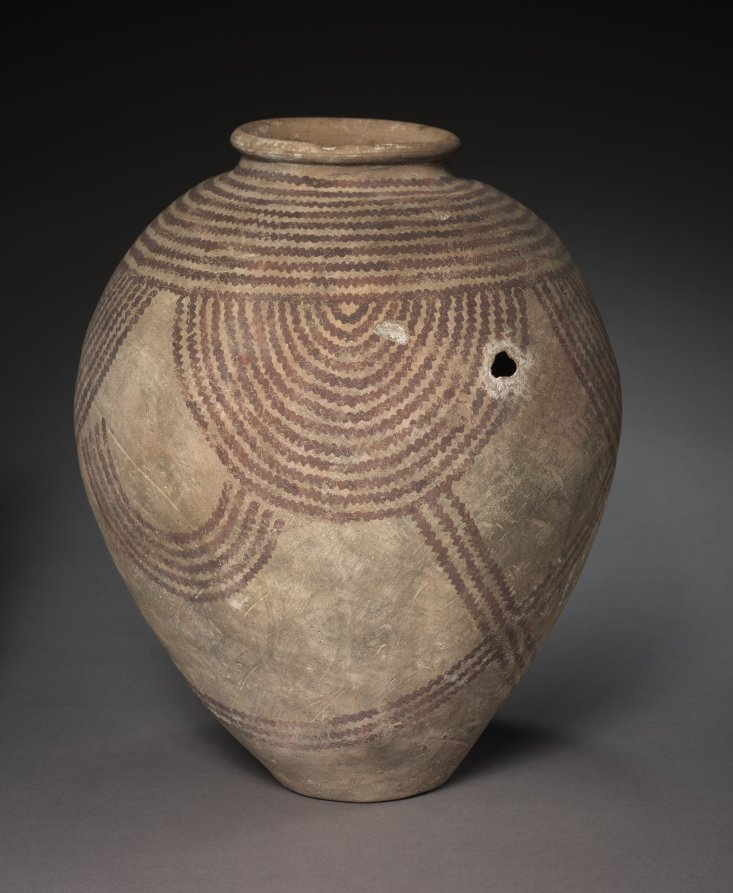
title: Decorated Jar with Rope Pattern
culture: Egypt, Predynastic (5000–2950 BCE), Naqada IId (3650–3300 BCE)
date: 4000–3000 BCE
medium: marl clay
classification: Vessels